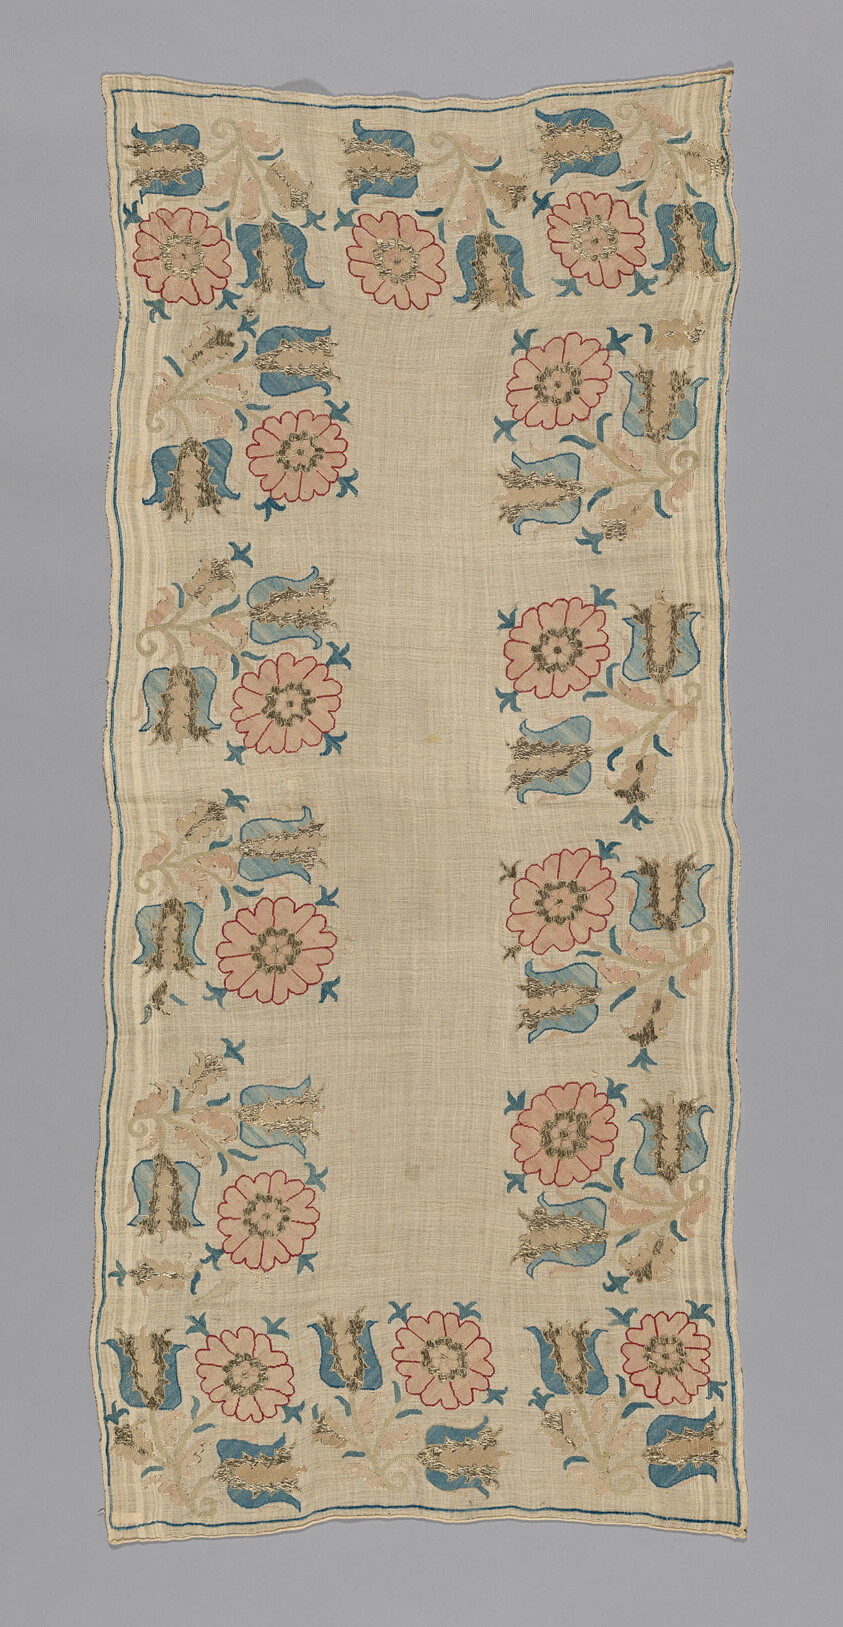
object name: Textile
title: Cover (Possibly for a Tray)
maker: Turkey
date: 18th century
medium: embroidered in repeated tulips.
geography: Turkey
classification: textile; needlework (visual works); weaving